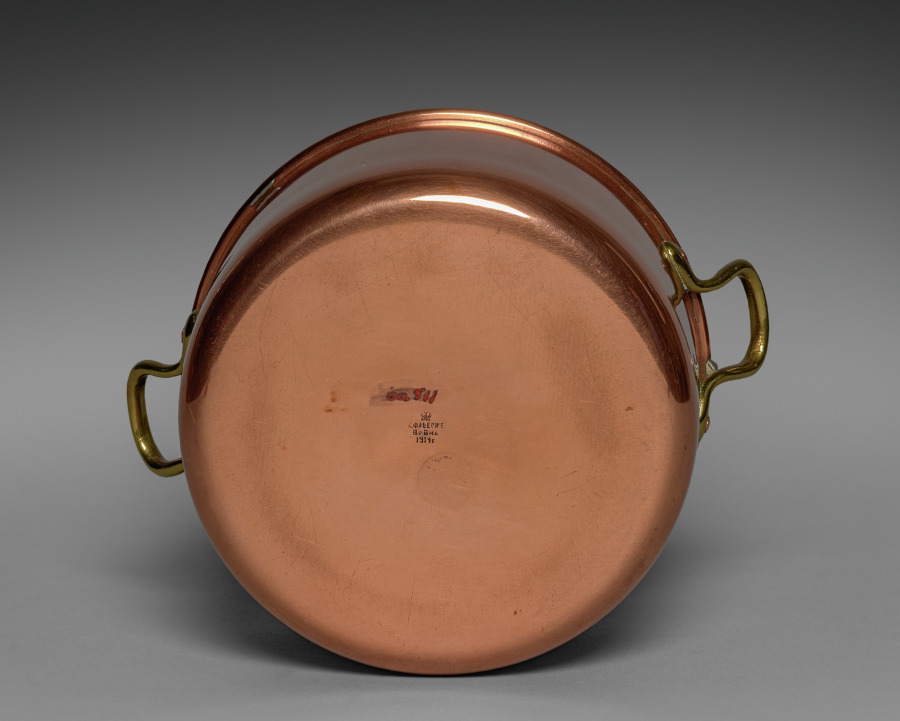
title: Pot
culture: Russia, St. Petersburg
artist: firm of Peter Carl Fabergé (Russian, 1846–1920)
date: 1914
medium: copper with brass handles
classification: Metalwork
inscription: inscribed: War (in Cyrillic), 1914r.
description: As Russia entered the First World War, austerity and economy settled into the fabric of life even among wealthy aristocrats and nobility. Not only were precious materials such as gold, silver, and gemstones hard to procure, but such luxury seemed out of place when so many men were dying at the front. Fabergé contributed to the war effort by making shells, casings, and other munitions out of brass and copper. He also made cookware, such as this small soup pot, to be sent to the front lines with provisions tucked inside. However, these simple forms only looked affordable. They were still a luxury only the wealthiest families could afford to send to their sons.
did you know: This copper soup pot was sent to the front lines filled with provisions during the First World War.